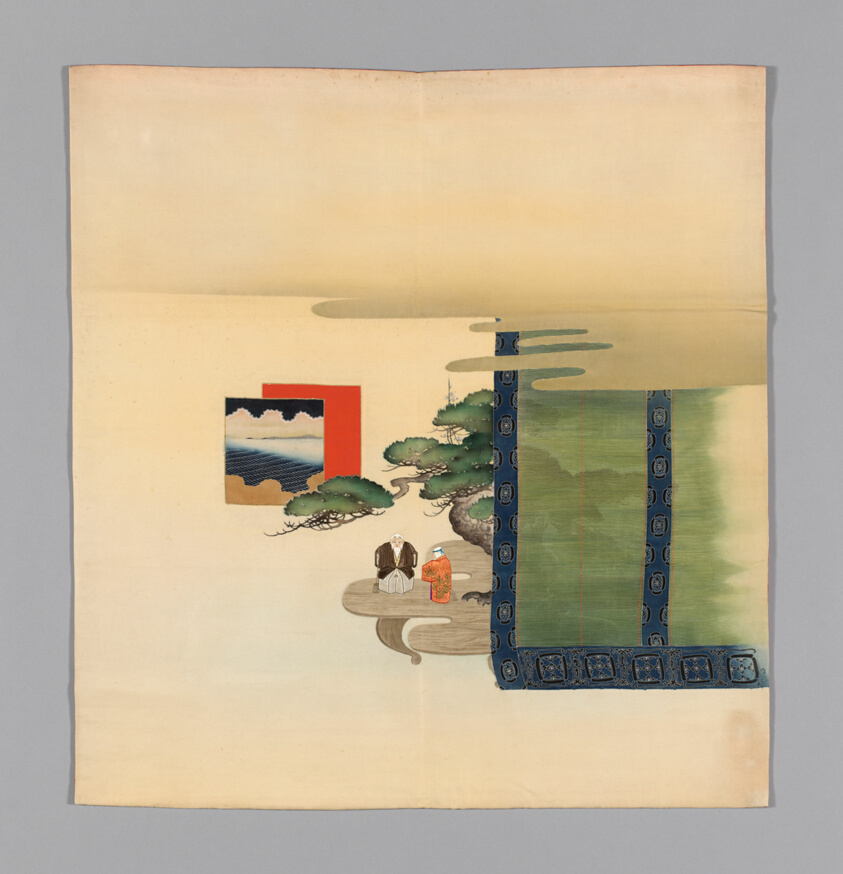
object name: Textile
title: Fukusa (Gift Cover)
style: meiji, Japanism, East Asian, asian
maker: Japan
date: 1900/12, late Meiji period (1868–1912)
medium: Woven in one piece (hikikaeshi); Mon side: silk, plain weave (shioze); dye extracted using chemical dye stripper; (bassen); stenciled (utsushinori yûzenzome and shigokizome); painted with India ink (sumi); embroidered with silk-gold-leaf-over-lacquered-on-paper-strip-wrapped silk in surface satin and straight stitches; laidwork, couching and silk padded couching; Patterned side: silk, plain weave (shioze); stenciled (utsushinori yûzenzome) and possible painted with India ink (sumi); embroidered with silk and gold-leaf-on-lacquered-paper-strip-wrapped silk in Chinese knots, satin, silk padded satin, surface satin, stem and straight stitches; laidwork and couching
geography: Japan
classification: textile; weaving - printed